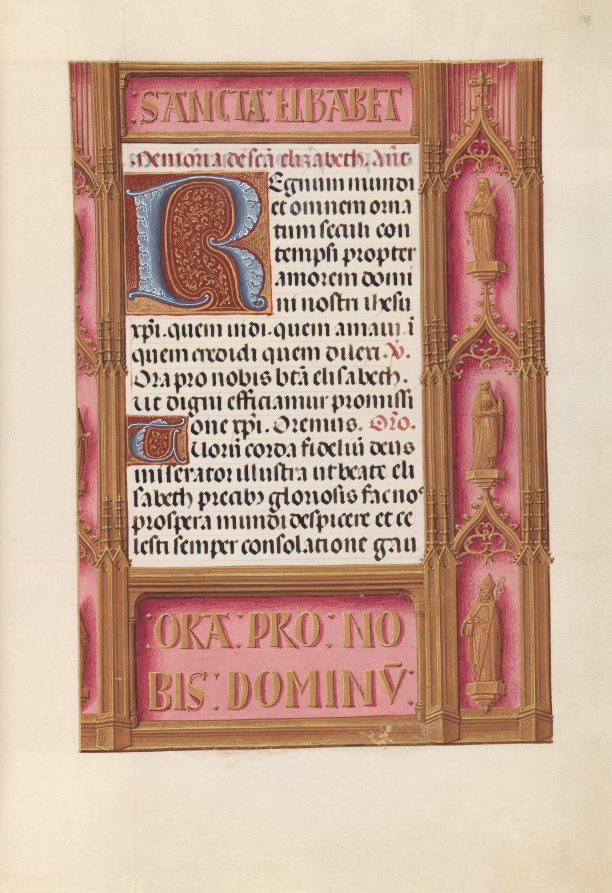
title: Hours of Queen Isabella the Catholic, Queen of Spain: Fol. 198r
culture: Flanders, Ghent and Bruges, late 15th century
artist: Master of the First Prayerbook of Maximillian (Flemish, c. 1444–1519)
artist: and Associates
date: c. 1500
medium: ink, tempera, and gold on vellum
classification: Bound Volume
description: This manuscript was illuminated by a circle of at least five highly organized manuscript painters active in the Flemish cities of Ghent and Bruges. The principal illuminator was Alexander Bening, who painted the majority of the book's miniatures. Manuscripts produced by this circle of artists are renowned for the decoration of their borders, which typically feature a rich variety of realistically-painted flowers, birds, and butterflies. This prayer book, called a book of hours, was intended not for a cleric, but for the private devotions of a lay person-in this case, Isabella the Catholic, Queen of Spain (1451-1504). Isabella's coat of arms embellishes the book's frontispiece. It is unlikely that the book was commissioned by the Queen herself; rather, she probably received it as a diplomatic gift from someone courting her patronage, perhaps Cardinal Francisco Jimenez de Cisneros. A Franciscan friar, Jimenez was dependent upon Isabella for his advancement, first to the post of Queen's confessor in 1492, and then to Archbishop of Toledo in 1495.